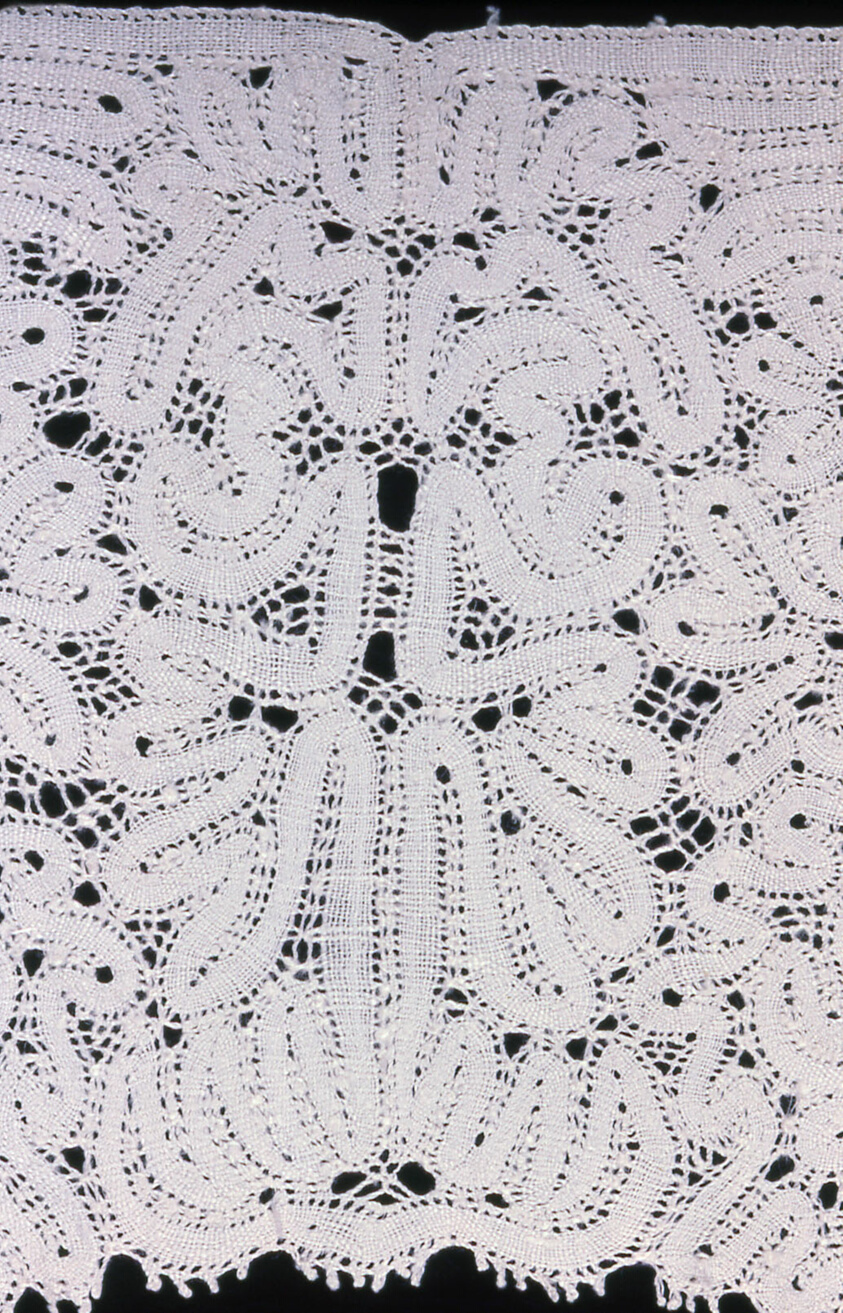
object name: Textile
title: Border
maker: Italy, Aquila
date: 1701/50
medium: Linen, bobbin part lace (made in large sections with a hook; continuous cloth work tapes)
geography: Italy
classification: textile; lace - bobbin